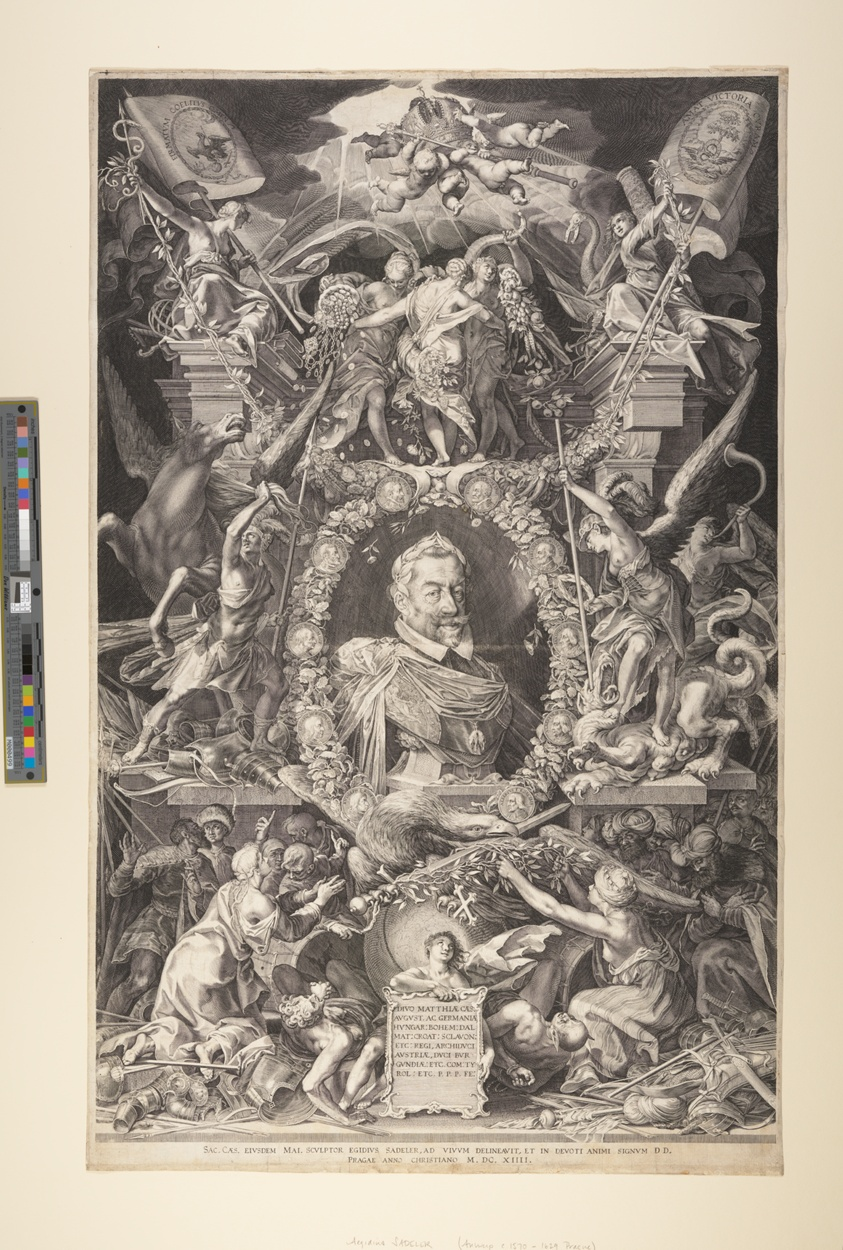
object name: Print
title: Emperor Matthias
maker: Aegidius Sadeler II; Flemish, c. 1570–1629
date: 1614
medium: Engraving on ivory laid paper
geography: Flanders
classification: engraving; paper; print; prints and drawing